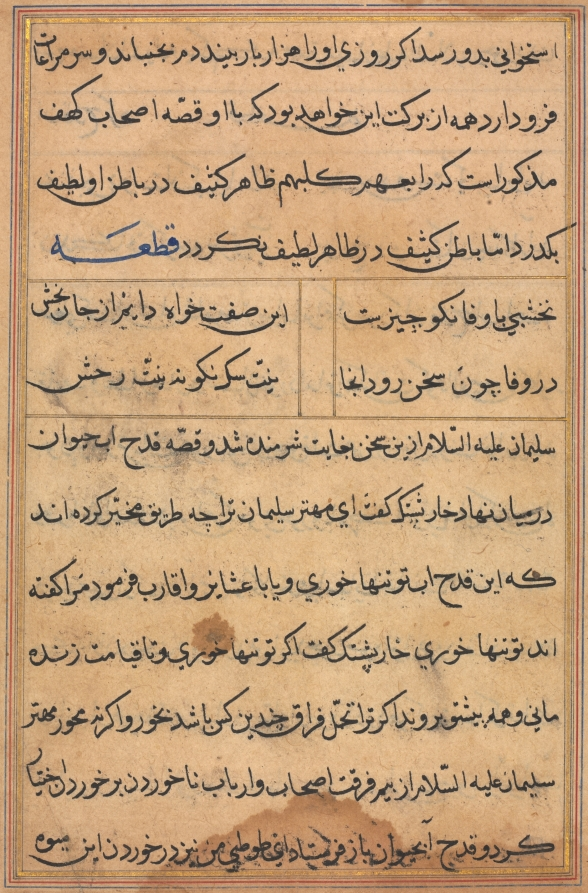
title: Page from Tales of a Parrot (Tuti-nama): text page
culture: Mughal India, court of Akbar (reigned 1556–1605)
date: c. 1560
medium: gum tempera, ink, and gold on paper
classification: Painting